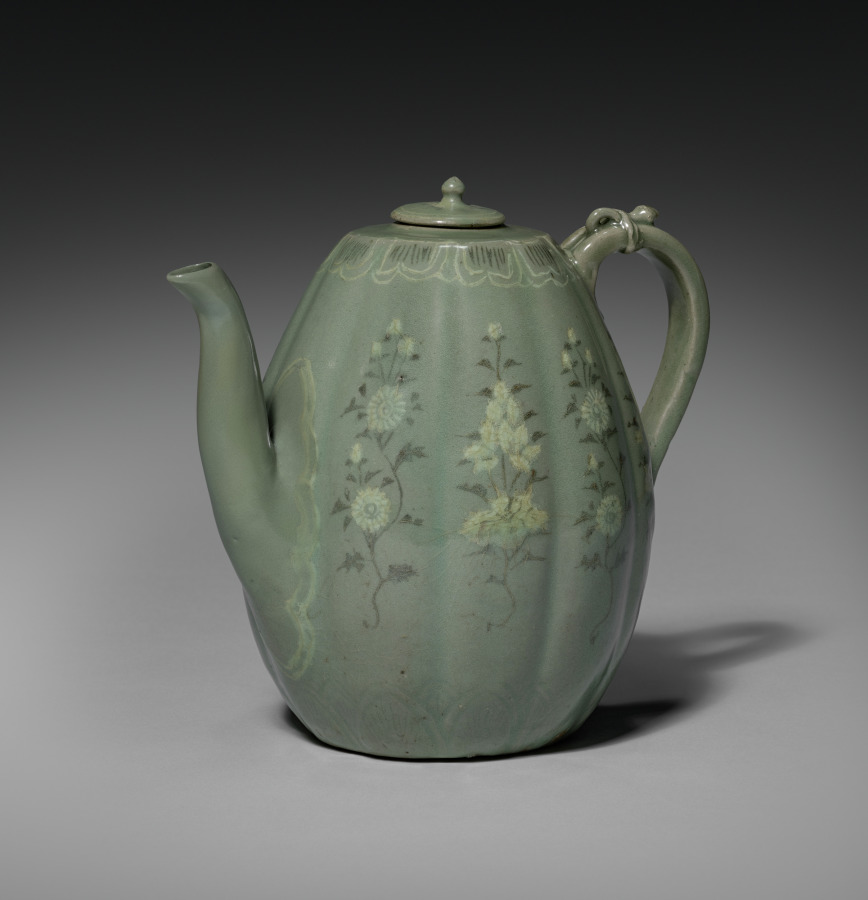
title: Pitcher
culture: Korea, Goryeo dynasty (918–1392)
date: 1100s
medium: celadon ware with inlaid white and black slip decoration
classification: Ceramic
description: The chrysanthemum is the flower of autumn. In East Asia, its wine was believed to bring longevity if drunk during the Double Nine Festival (September 9). "Drinking Wine," a poem by Tao Yuanming (365–427), combines the flower with the theme of the reclusive life: "From the eastern fence, I pluck chrysanthemum flowers, and idly look toward the southern hills." In Korea, the chrysanthemum was established as a popular motif for Goryeo inlaid celadon as early as the 1100s. The flower was used as the main motif for wine service vessels in particular. When Koreans drank wine from Goryeo celadon decorated with chrysanthemum designs, they believed that Tao’s faithful spirit transferred to their inner mind, as did the blessings of longevity.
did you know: The shape of this pitcher resembles is a type of yellow muskmelon cultivated mainly in East Asia.